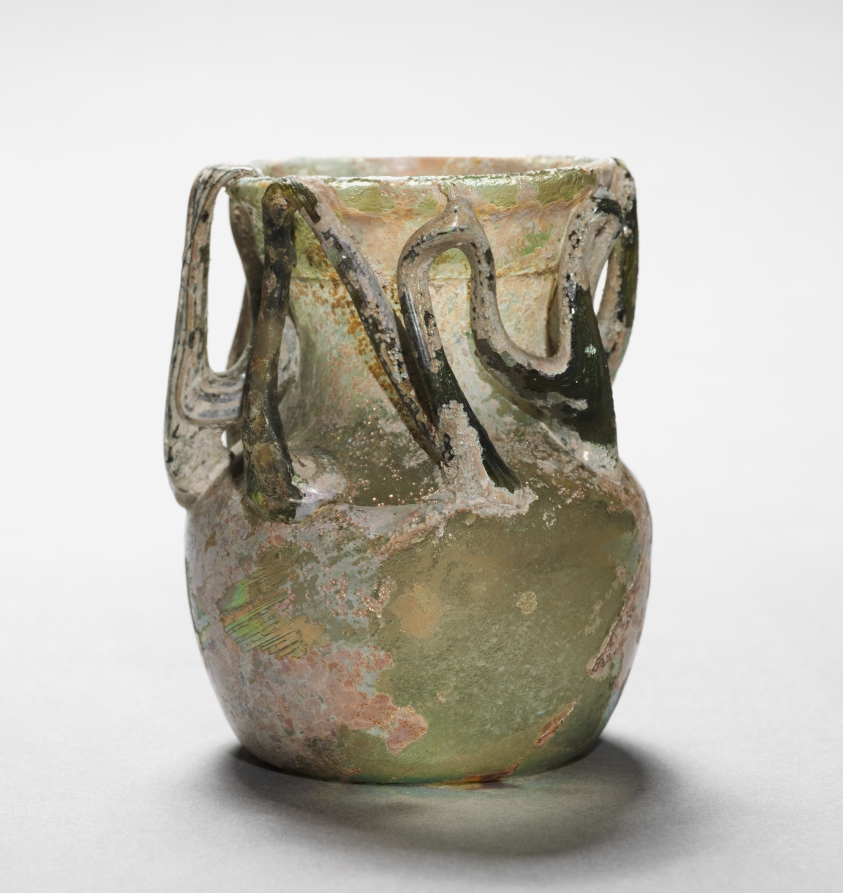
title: Vase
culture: Italy, Roman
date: 100–300 CE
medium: glass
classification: Glass